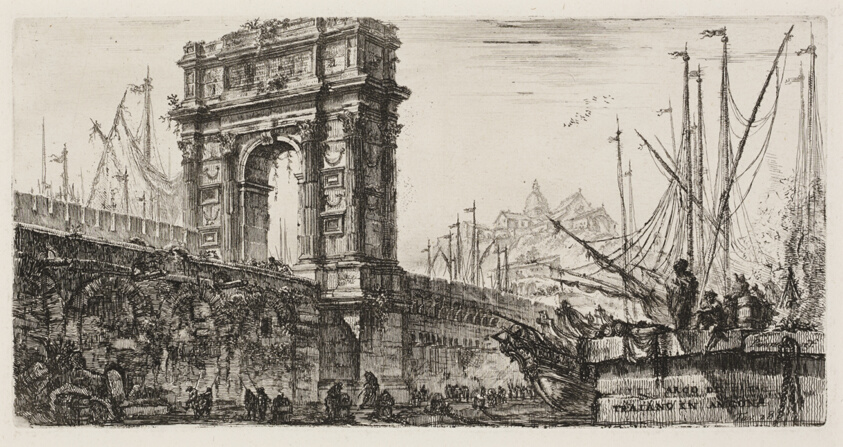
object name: Print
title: Arch of Trajan in Ancona, plate 28 from Some Views of Triumphal Arches and other monuments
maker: Giovanni Battista Piranesi (Italian, 1720-1778)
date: 1748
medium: Etching on ivory laid paper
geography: Italy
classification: etching; print; prints and drawing